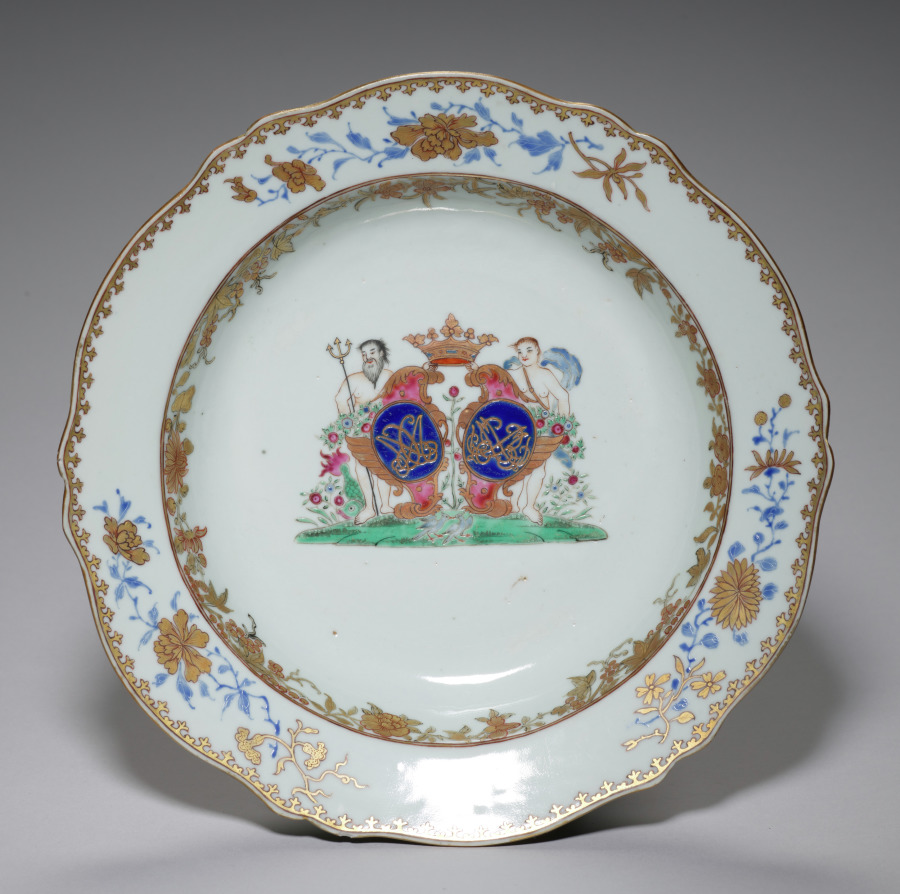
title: Soup Plate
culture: China, Chinese Export, 18th century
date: 1760–70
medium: porcelain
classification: Ceramic